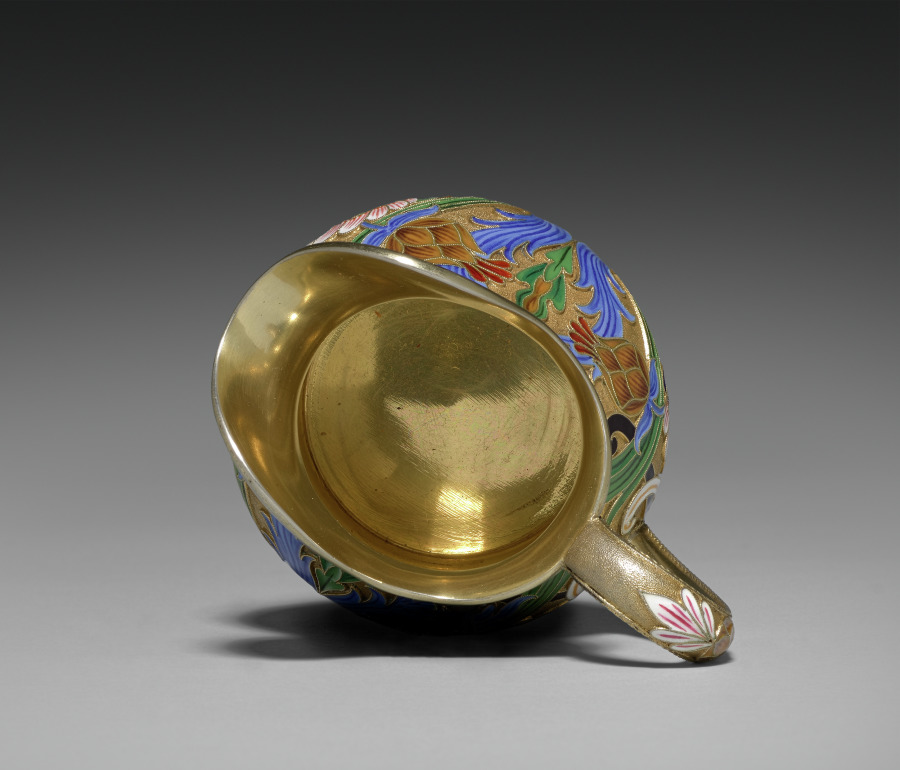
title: Creamer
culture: Russia, St. Petersburg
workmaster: attributed to Feodor Ivanovich Rückert (Russian, 1840–1917)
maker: House of Fabergé (Russian, 1842–1918)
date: 1887–96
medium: silver gilt, opaque cloisonné enamel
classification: Miscellaneous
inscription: 88, St. George [assay mark for Moscow, 1882-1896]; C. Fabergé (in Cyrillic); double-headed eagle [imperial warrant]; 10593 scratched.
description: Fabergé’s craftsmen in Moscow, especially under the watchful eye of workmaster Feodor Rückert, became known for their work in the Pan-Slavic or Neo-Russian style, hearkening back to 17th-century motifs of Russian folk art. Often on rather conventional shapes, Rückert and his silversmiths created an explosion of color, achieved through the historic technique of cloisonné enamel in which tiny metal lines are soldered to the surface then filled with glass powders in various colors and fired to create a high gloss finish. The result is a spectacular evocation of the 17th-century originals. Far from mere copies, however, Rückert's designs, such as this tea service, employ naturalistic or abstract motifs in a thoroughly modern adaptation of a remarkable earlier period of Russian art and decoration.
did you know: This creamer is part of a larger tea service.